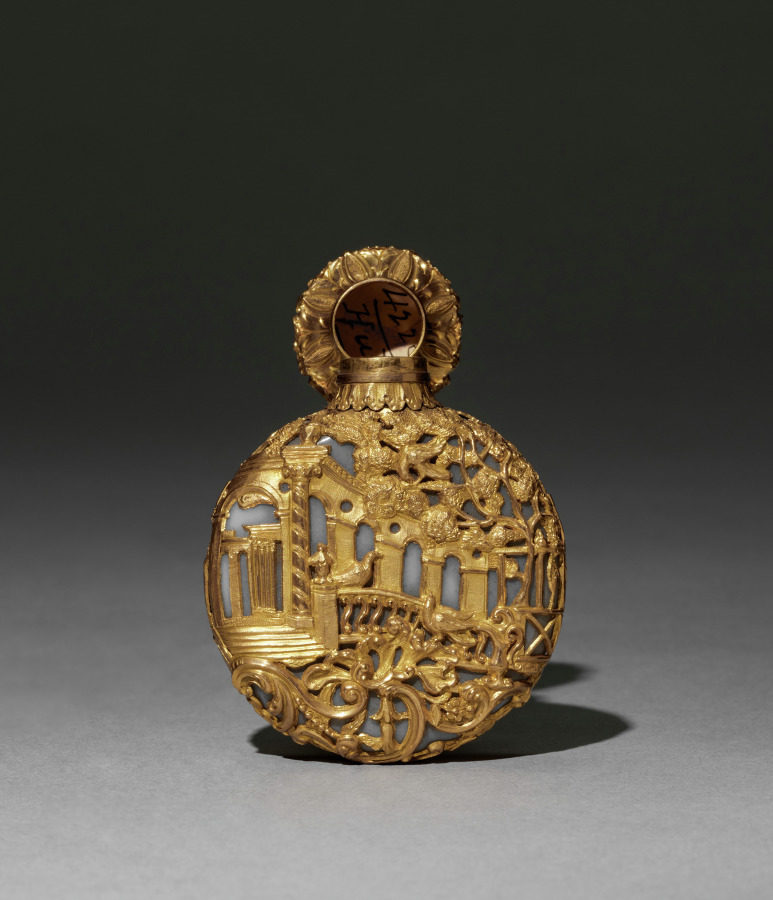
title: Scent Bottle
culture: Germany (?)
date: 1800s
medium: blue-gray opaline glass mounted in gold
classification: Miscellaneous